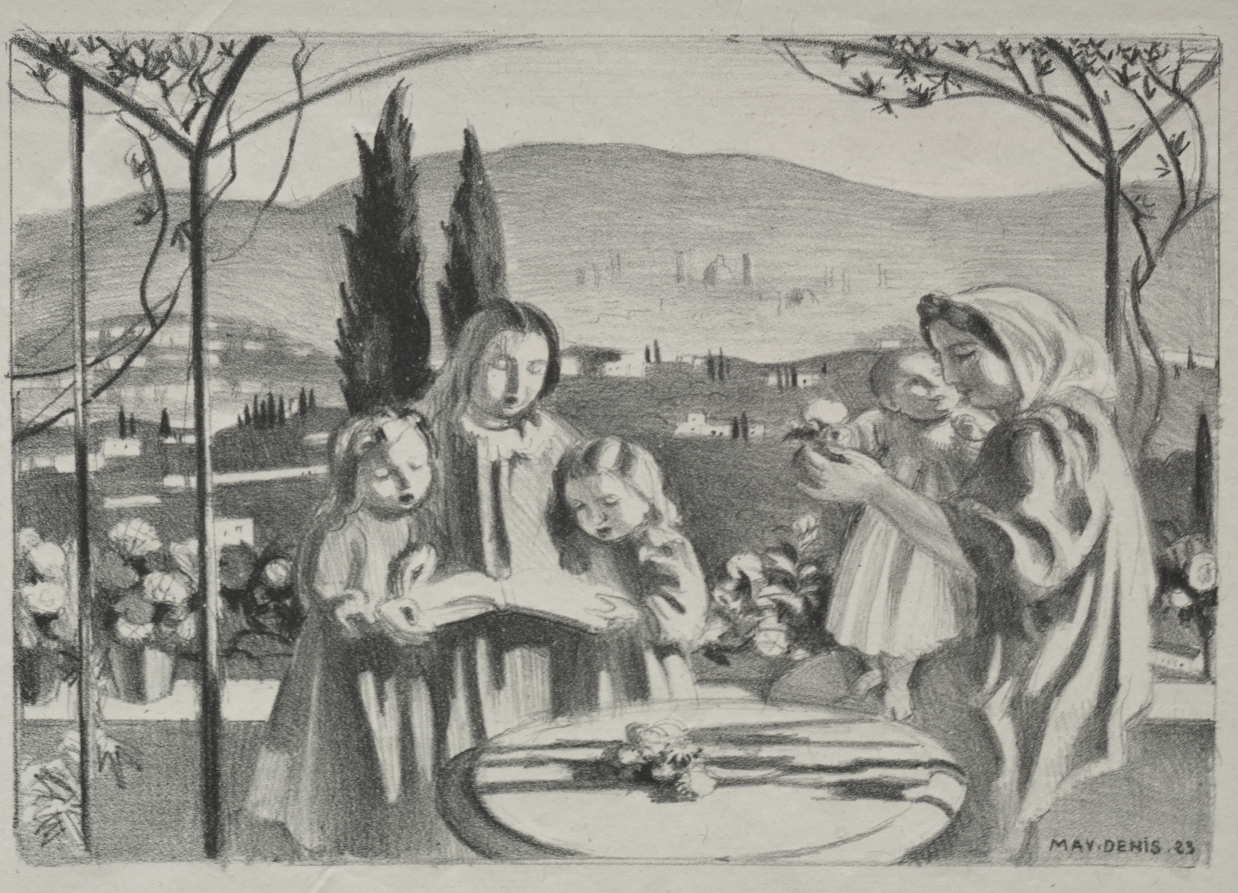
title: The Terrace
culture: France, 20th century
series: Essay on the History of Lithography in France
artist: Maurice Denis (French, 1870–1943)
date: 1923, published 1924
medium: lithograph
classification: Print